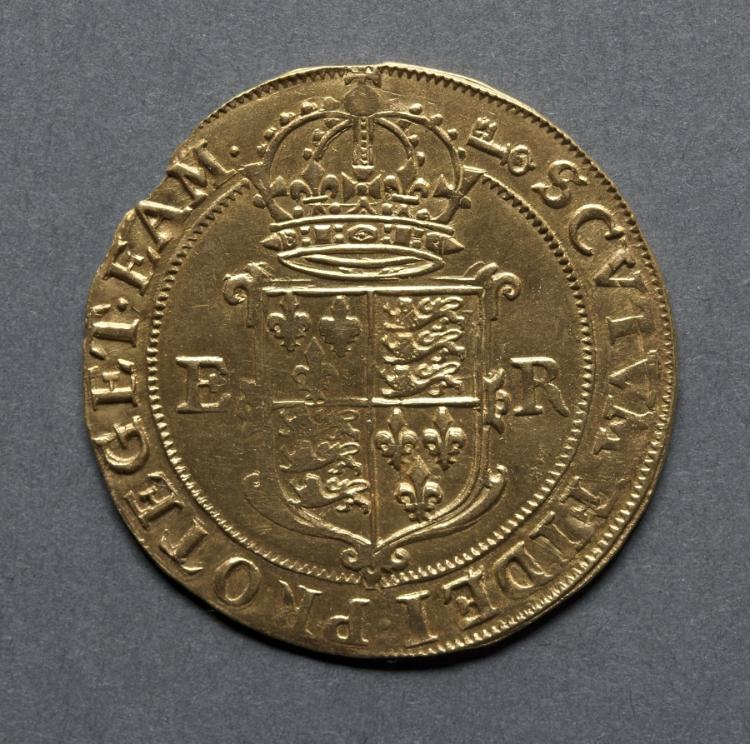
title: Pound: Crowned Shield of Arms (reverse)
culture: England, Elizabeth I, 1558-1603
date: 1595–1598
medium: gold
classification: Coins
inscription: SCVTVM FIDEI PROTEGET EAM